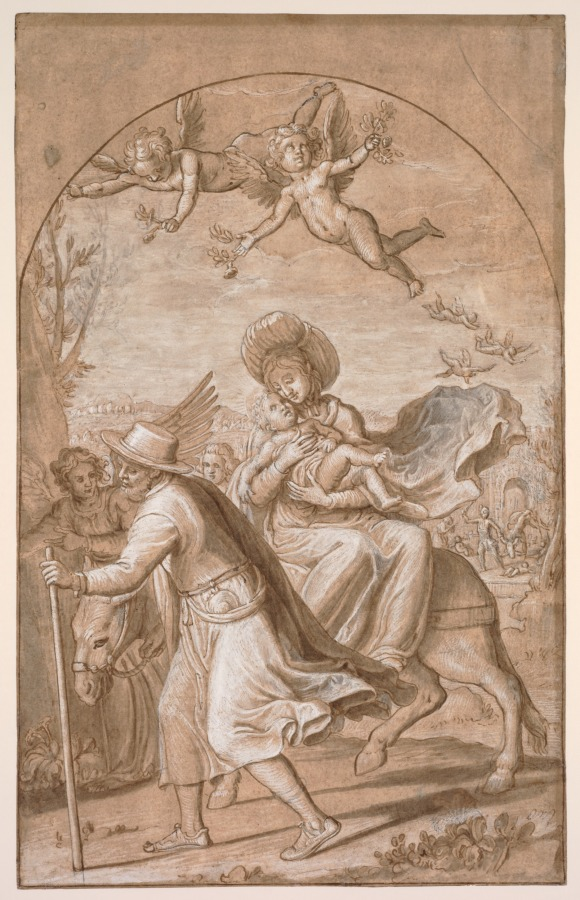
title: The Flight into Egypt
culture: Italy, 16th century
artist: Gregorio Pagani (Italian, 1558–1605)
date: c. 1590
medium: pen and brown ink and wash, heightened with white, over black chalk, on beige paper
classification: Drawing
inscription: Inscribed, upper left, "i. . .", and numbered, upper right, 52 inscribed in brown ink, "verso, Di mano del Bamberucci denetri (?) da lui" and "pagani" (?)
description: In this composition, Gregorio Pagani remained close to the New Testament account of the final episode of Christ’s nativity (Matthew 2:13–23), in which Joseph, Mary, and infant Jesus fled into Egypt after learning that King Herod intended to kill all the male infants of Jerusalem. Staff in hand, Joseph forges ahead while Mary and Jesus follow behind on a donkey. Fluttering angels hover above; one at the left urges the Holy Family onward. Pagani was commissioned by the Médicis to create decorative schemes for their celebrations, and especially for altarpieces for churches and convents, but few of his paintings have survived. He is best known for highly finished, fully realized drawings such as this example in pristine condition.